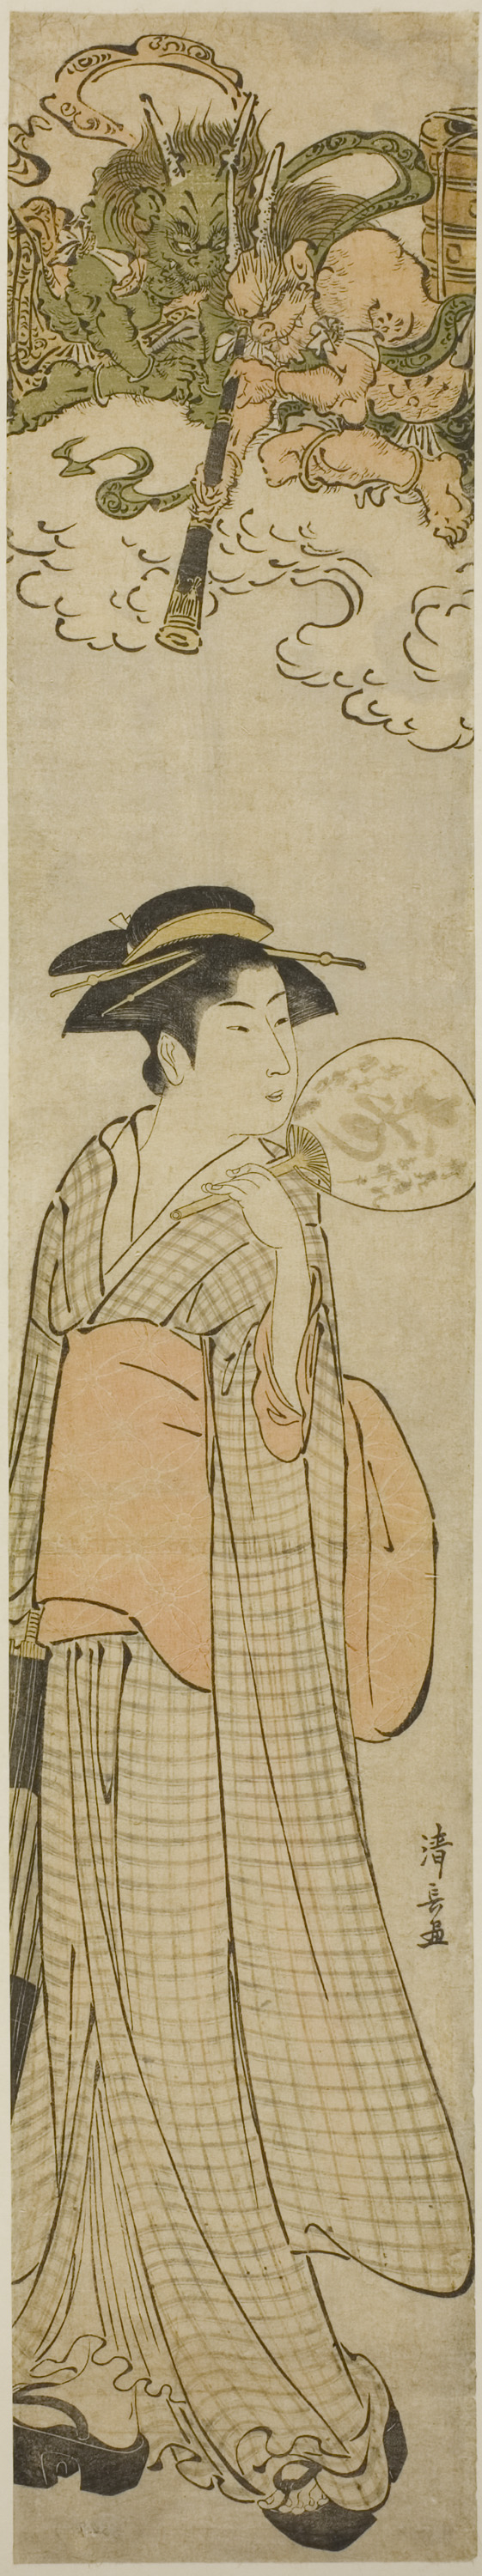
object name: Print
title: Love-Smitten Demons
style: Japanese (culture or style)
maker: Torii Kiyonaga (Japanese, 1752-1815)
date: c. 1782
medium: Color woodblock print; hashira-e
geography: Japan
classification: woodblock print; print; asian art